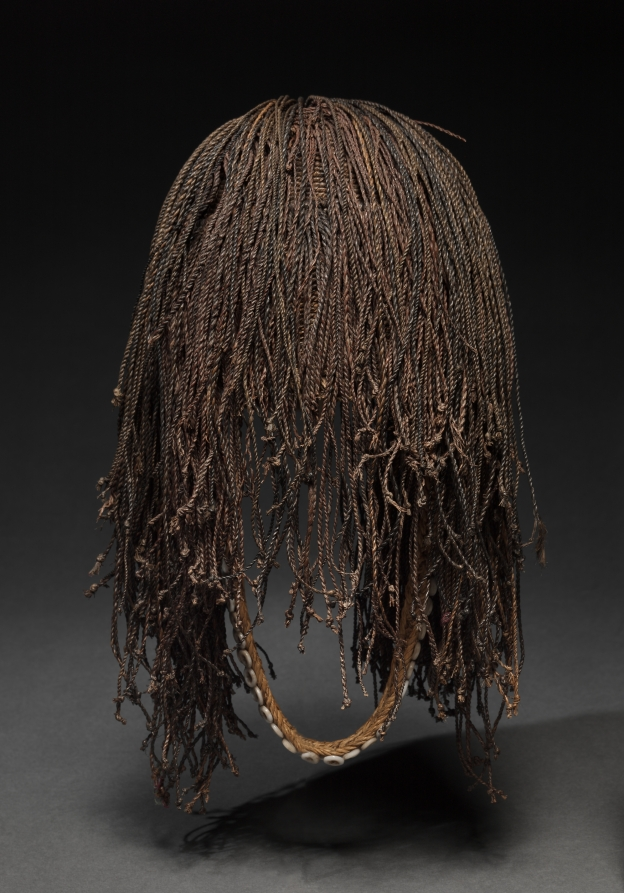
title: Man's Bwami Prestige Cap (sawamazembe)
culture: Africa, Central Africa, Democratic Republic of Congo, Lega-style maker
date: early to mid-1900s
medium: Plant fiber, seashells, seeds, pods, buttons, and probably cotton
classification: Garment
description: Among the Lega people of the eastern Democratric Republic of Congo, headgear was an important indicator of social position. Certain caps, headbands, and headdresses were the exclusive prerogative of the Bwami men's association. This headdress, called sawamazembe, was worn only by high-ranking members of this group. The hat's wig-like form represents a woman's coiffure, illustrating the blurring of gender distinctions among high-ranking Bwami members. The shell ornaments on the front suggest the moon, while buttons and a seed pod provide additional embellishment.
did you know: This prestige cap combines local organic materials and imported machine-made materials like buttons.